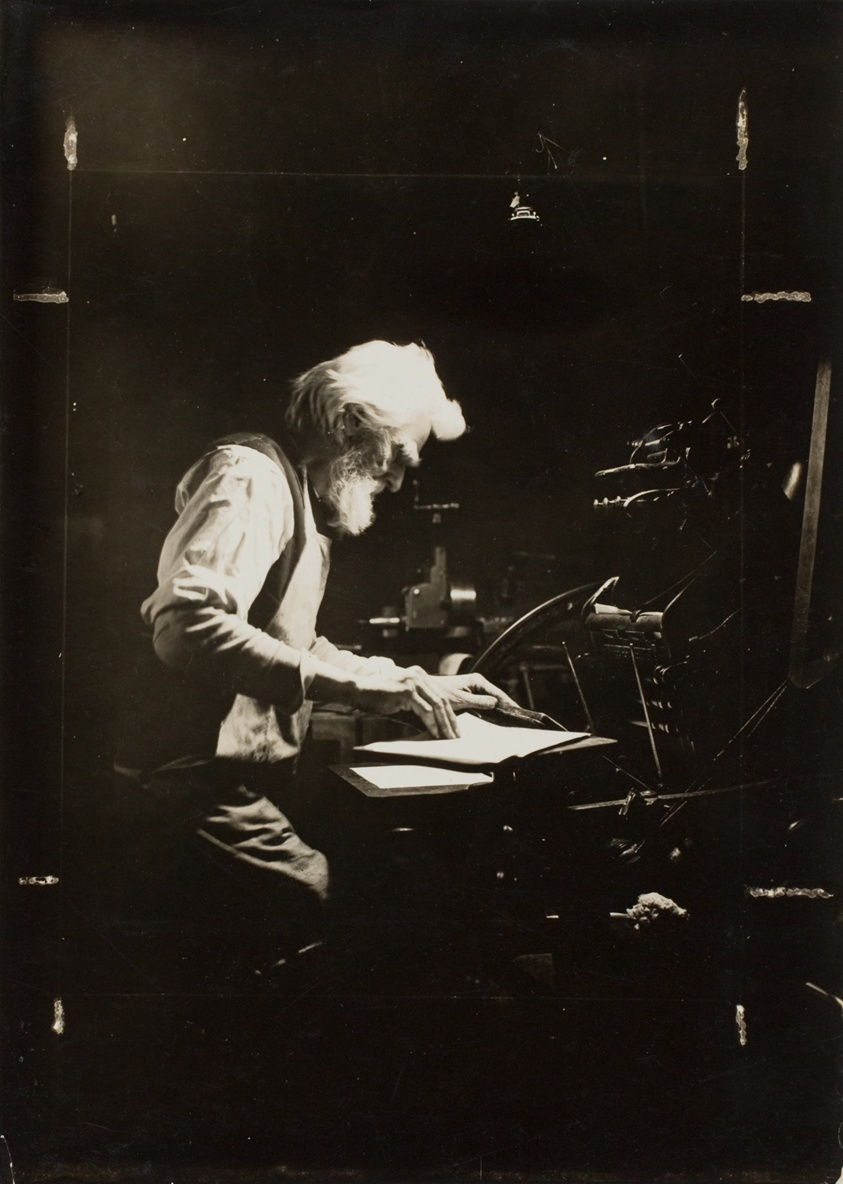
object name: Photograph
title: Printer and Craftsman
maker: Lewis Wickes Hine (American, 1874–1940)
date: 1905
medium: Gelatin silver print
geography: United States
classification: photograph; photography